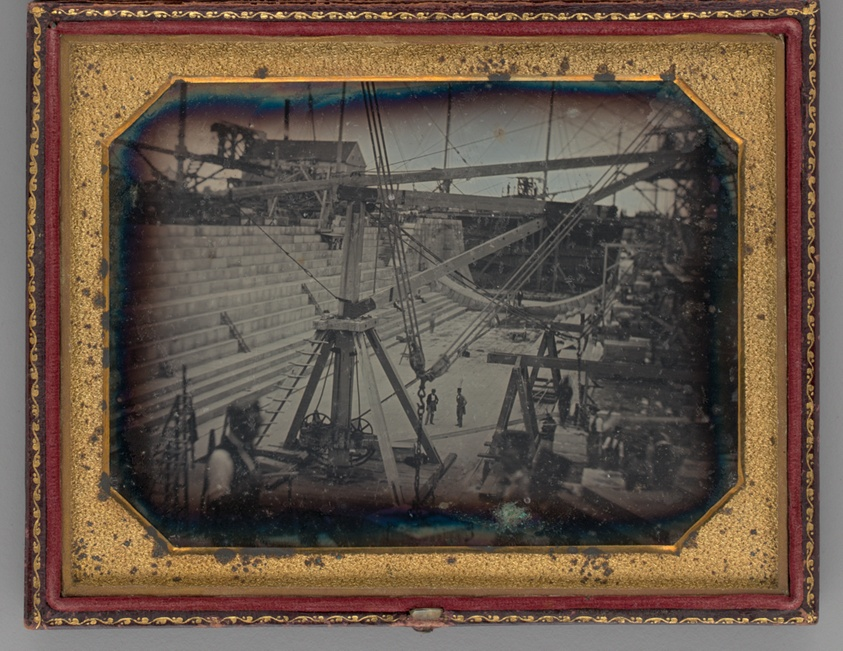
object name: Photograph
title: Untitled (Construction of the First Drydock, U.S. Navy Yard, Dry Dock #1 Brooklyn, NY)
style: 19th century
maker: Unknown maker; American, 19th century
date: 1845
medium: Daguerreotype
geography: United States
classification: portrait; daguerreotype; portrait; photograph; photographic process; photography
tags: lundberg collection, people, ships